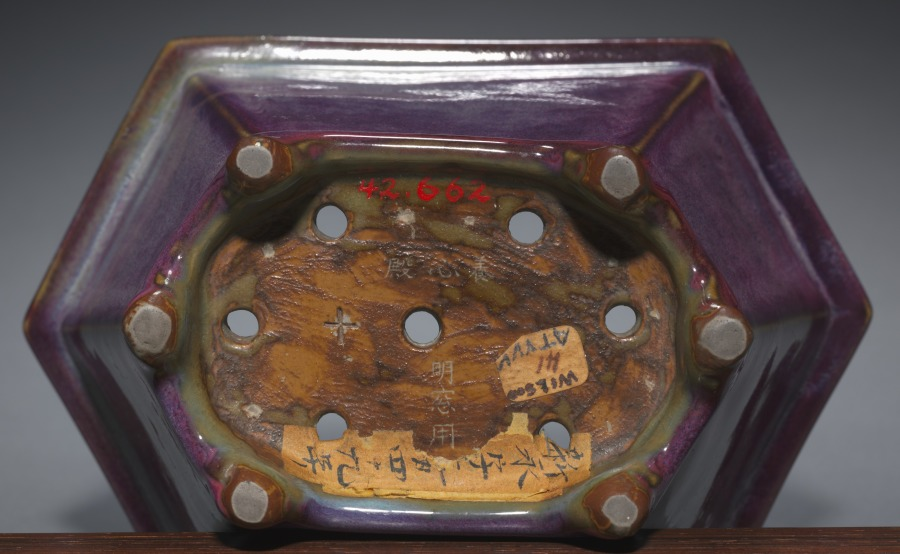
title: Hexagonal Flower Pot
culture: China, Henan province, Yuxian, Juntai, Ming dynasty (1368-1644)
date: early 1400s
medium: porcelaneous stoneware, numbered Jun ware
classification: Ceramic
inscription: 十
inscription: 明窓用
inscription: 養心殿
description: This deep hexagonal flowerpot, one of a pair in the collection, is numbered "10" and bears additional inscriptions to specifically indicate the location of its usage within the palace: "for use in the Study of Illumination (Mingchuang yong)" within the "Hall of Cultivating the Mind (Yangxin Dian)" of the Forbidden City. The inscriptions seem to suggest the Qing imperial provenance of this flower pot.